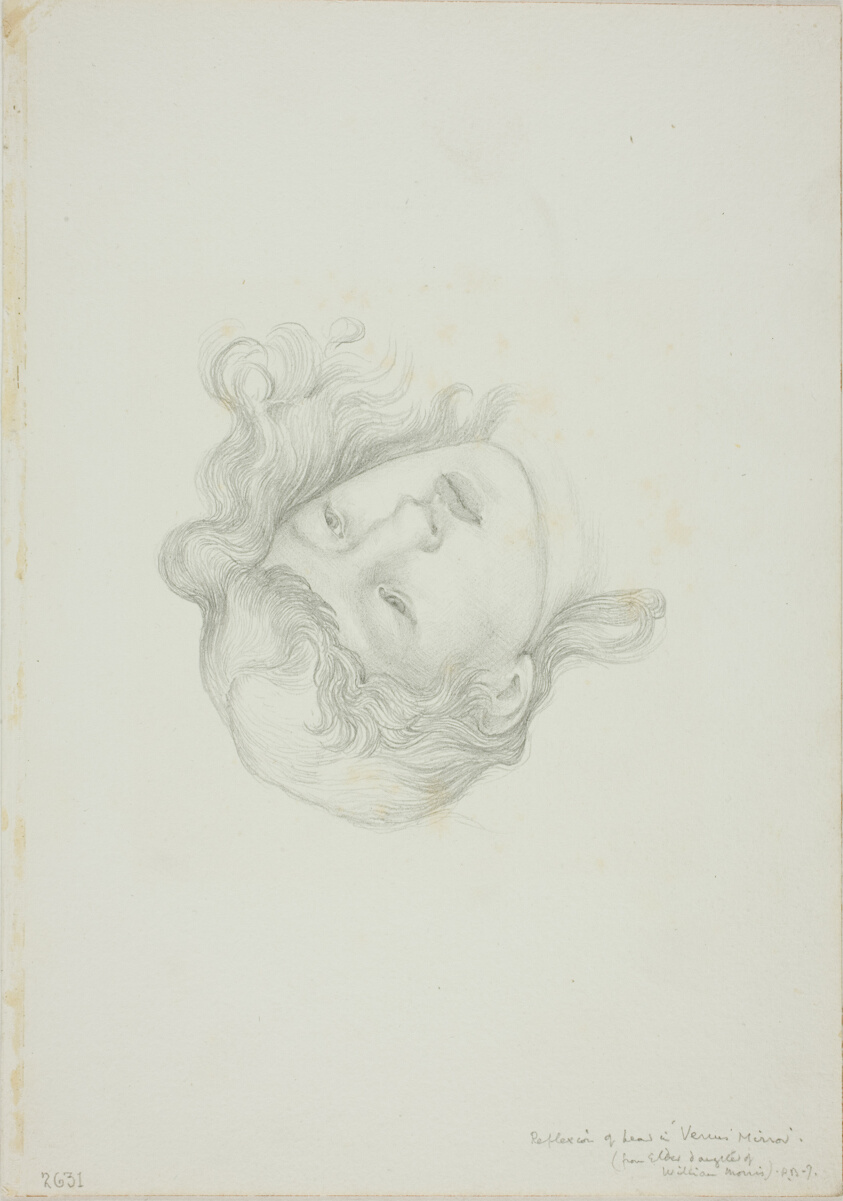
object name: Drawing and Watercolor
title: Reflection of Head, study for Mirror of Venus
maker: Sir Edward Burne-Jones (English, 1833-1898)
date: c. 1873–77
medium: Graphite on ivory wove paper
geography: England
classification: graphite; drawings (visual works); prints and drawing